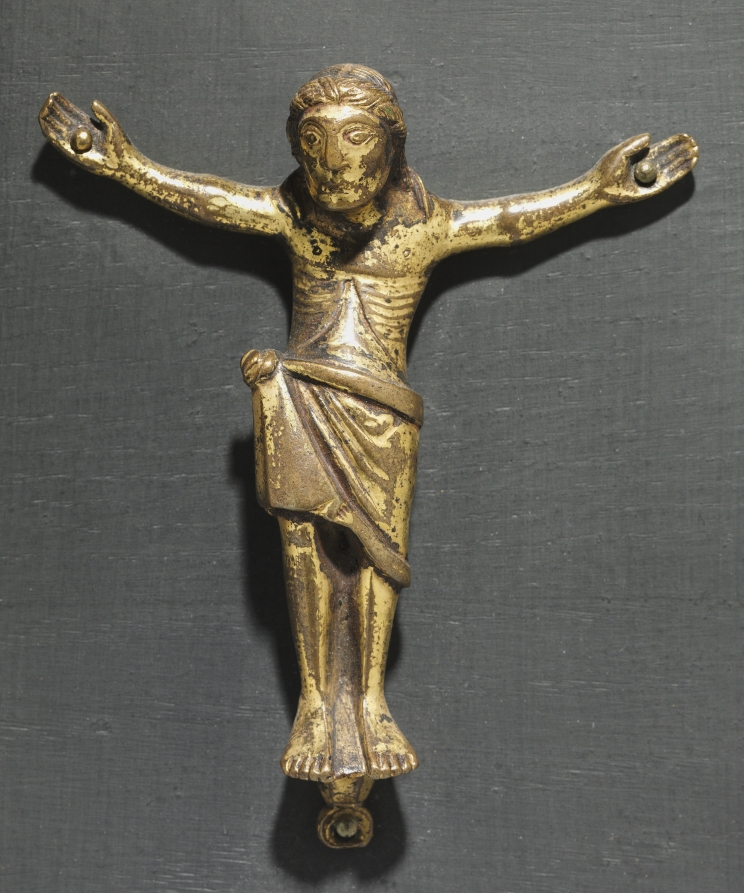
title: Corpus of Christ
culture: Mosan, Valley of the Meuse, Romanesque period, 12th century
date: c. 1150–1175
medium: bronze: cast, traces of gilding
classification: Sculpture